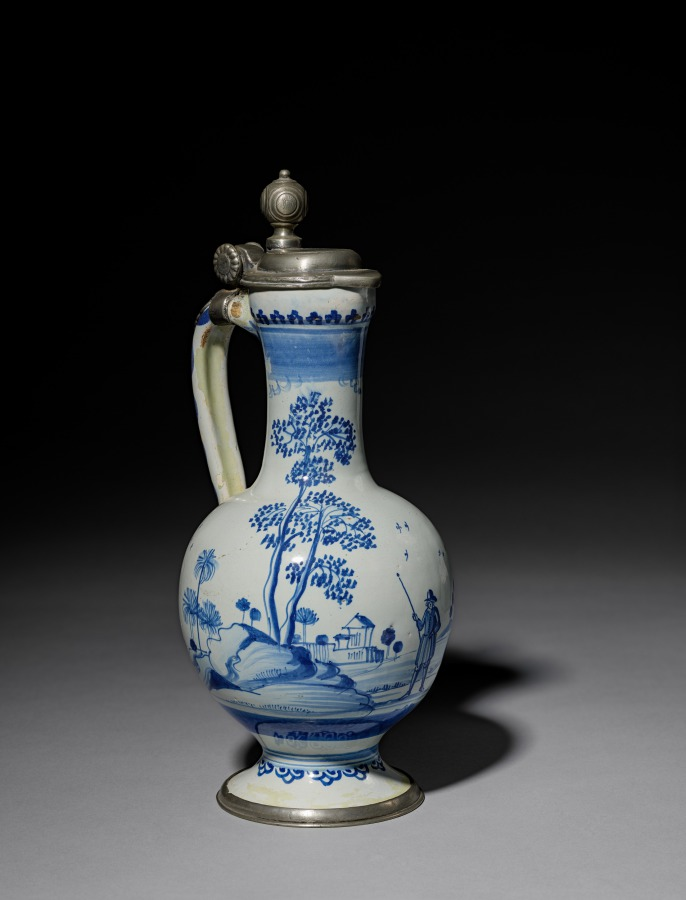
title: Covered Jug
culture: Germany, Bayreuth(?), 18th century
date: 1750–75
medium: earthenware decorated in underglaze blue with pewter mounts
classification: Ceramic